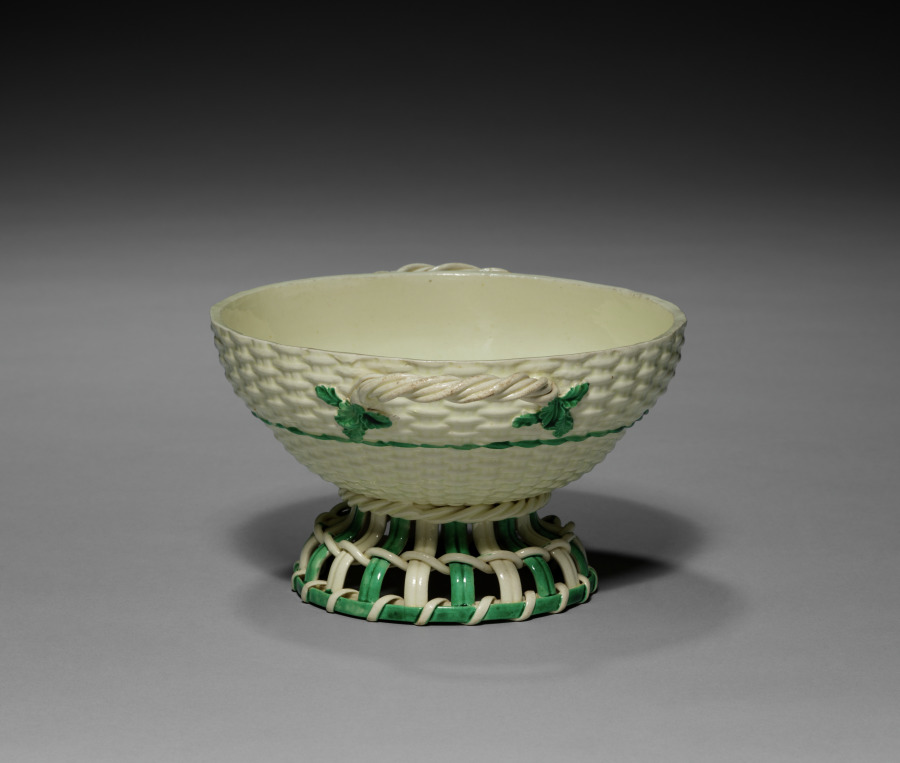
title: Wicker-Work Sauce Tureen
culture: England, 18th-19th century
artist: Wedgwood Factory (British)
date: c. 1780–1840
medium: earthenware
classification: Ceramic